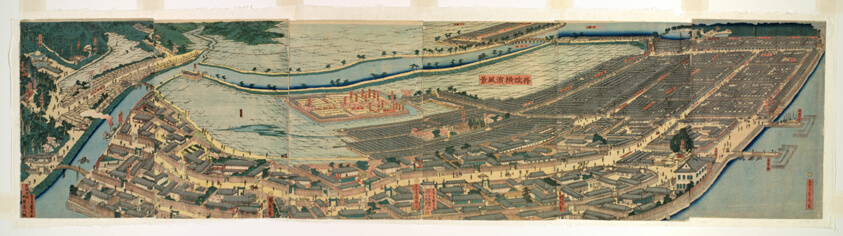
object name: Print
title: Revised Panoramic View of Yokohama (Saikai Yokohama fukei)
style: Japanese (culture or style)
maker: Utagawa Sadahide (Japanese, 1807-1873)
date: 1861 and 1873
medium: Color woodblock print; oban polyptych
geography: Japan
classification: print; asian art